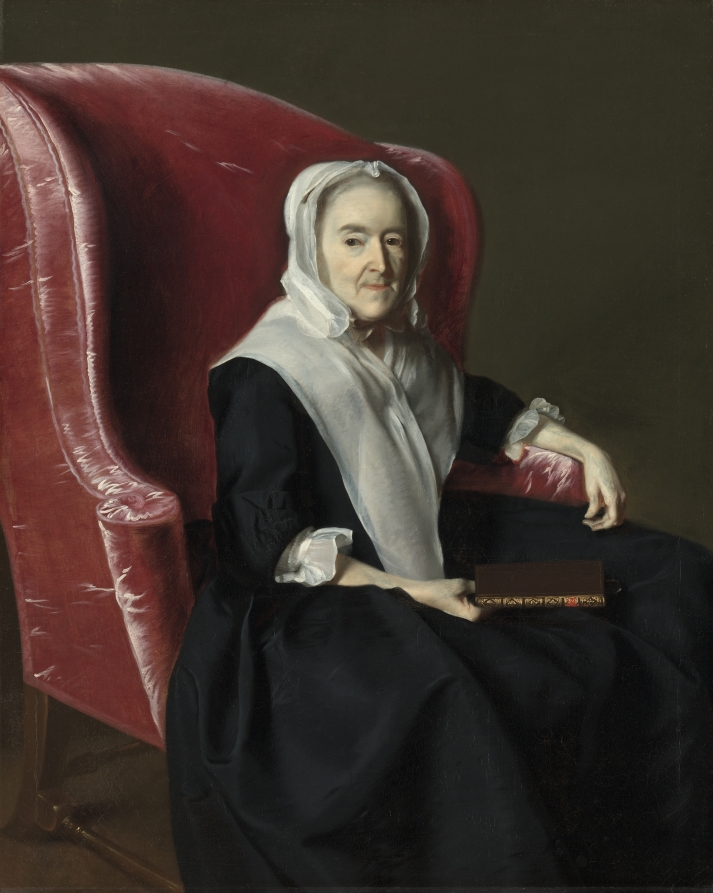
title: Anna Dummer Powell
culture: America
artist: John Singleton Copley (American, 1738–1815)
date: 1764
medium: oil on canvas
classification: Painting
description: Less than two months before the 80-year-old Powell passed away, one of her sons commissioned this portrait in order to commemorate her life and create an heirloom for future generations. According to the sitter’s granddaughter, Powell was “a little woman of sober conviction and strong Presbyterian faith.” The painting passed through a line of female descendants until shortly before it was given to the museum.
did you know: The museum also owns Copley’s original bill of sale for this painting and its frame.